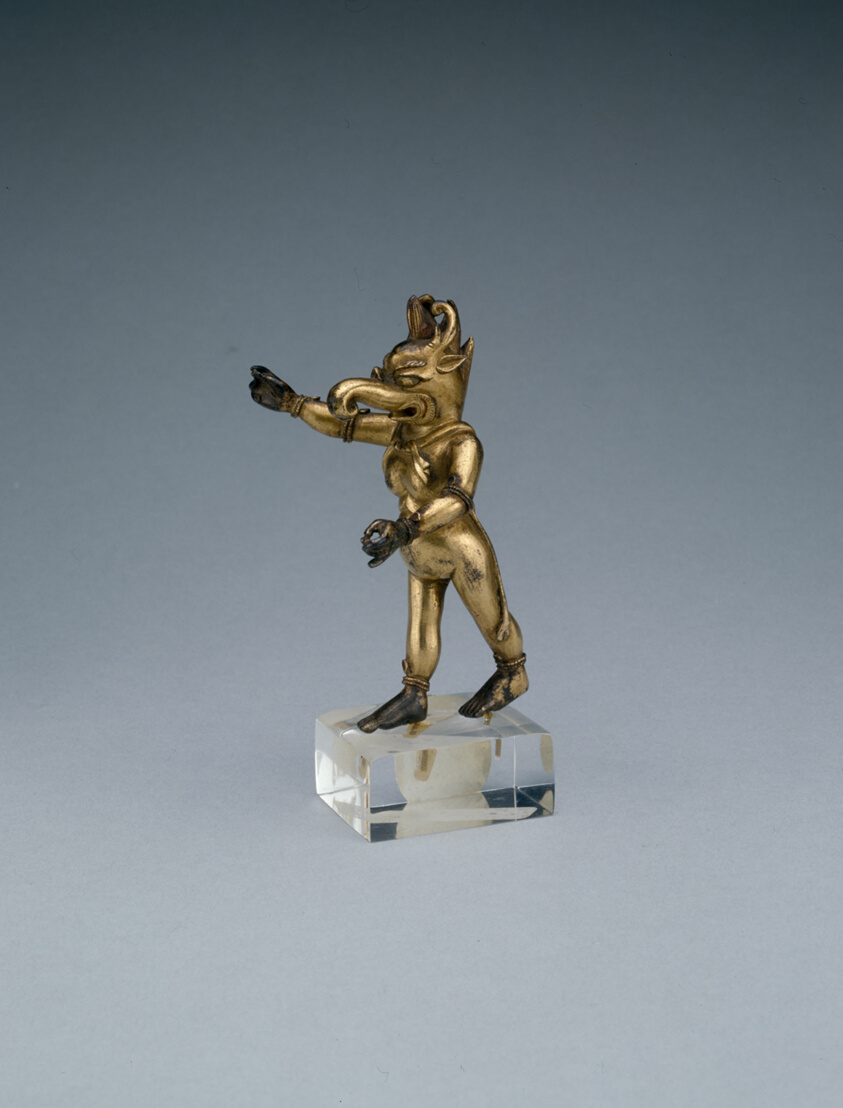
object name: Sculpture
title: Crocodile-Headed Female Buddhist Deity (Makaravaktra Dakini)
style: Himalayan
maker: Tibet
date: 18th century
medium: Gilt bronze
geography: Tibet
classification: bronze; metal; sculpture; asian art